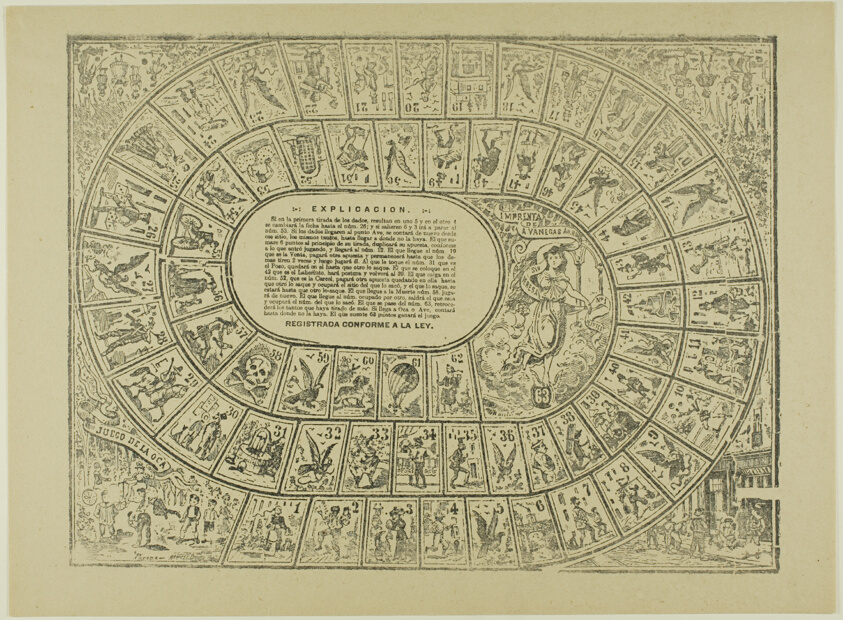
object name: Print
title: Game of the Goose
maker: José Guadalupe Posada (Mexican, 1852-1913)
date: 1909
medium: Relief engraving on zinc on paper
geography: Mexico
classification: lithograph; print; prints and drawing